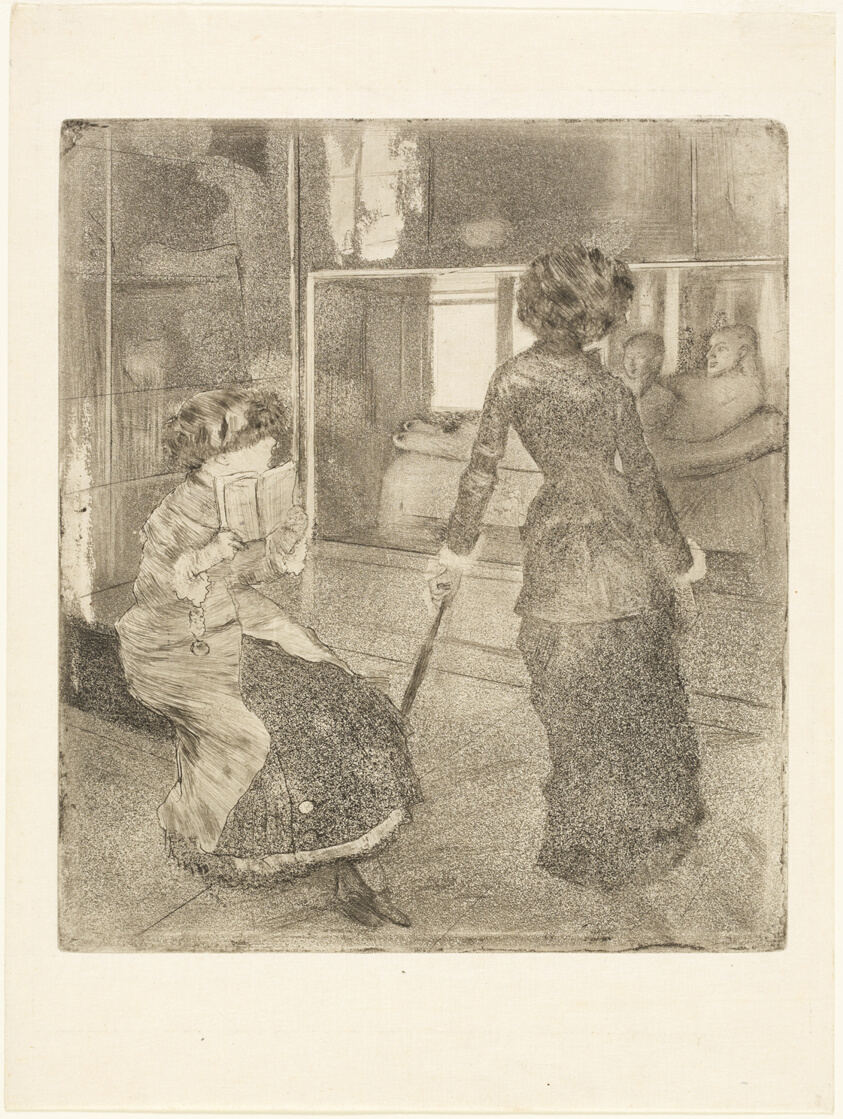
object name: Print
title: Mary Cassatt at the Louvre: The Etruscan Gallery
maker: Edgar Degas; French, 1834-1917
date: 1879–80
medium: Soft ground etching, drypoint, aquatint, and etching on cream Japanese paper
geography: France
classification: etching; print; prints and drawing; paper